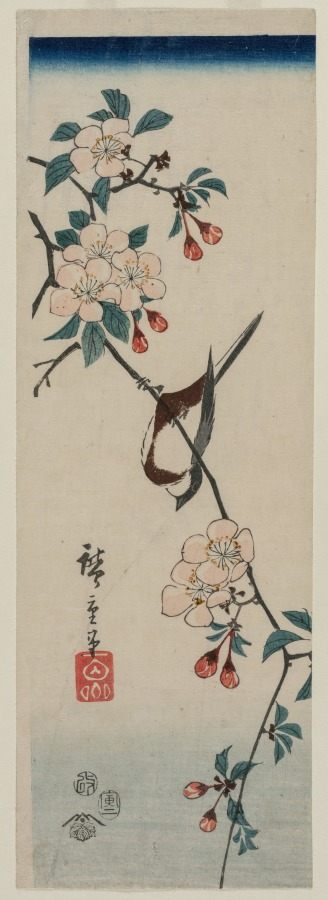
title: Small Bird (Swallow ?) on Cherry Branch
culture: Japan, Edo period (1615–1868)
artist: Utagawa Hiroshige (Japanese, 1797–1858)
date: 1854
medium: color woodblock print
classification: Print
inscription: Signature: Hiroshige hitsu. Artist Seal: Ichiryusai. Publisher: Tsutaya Kichizo (emblem). Censorship Seal: aratame.